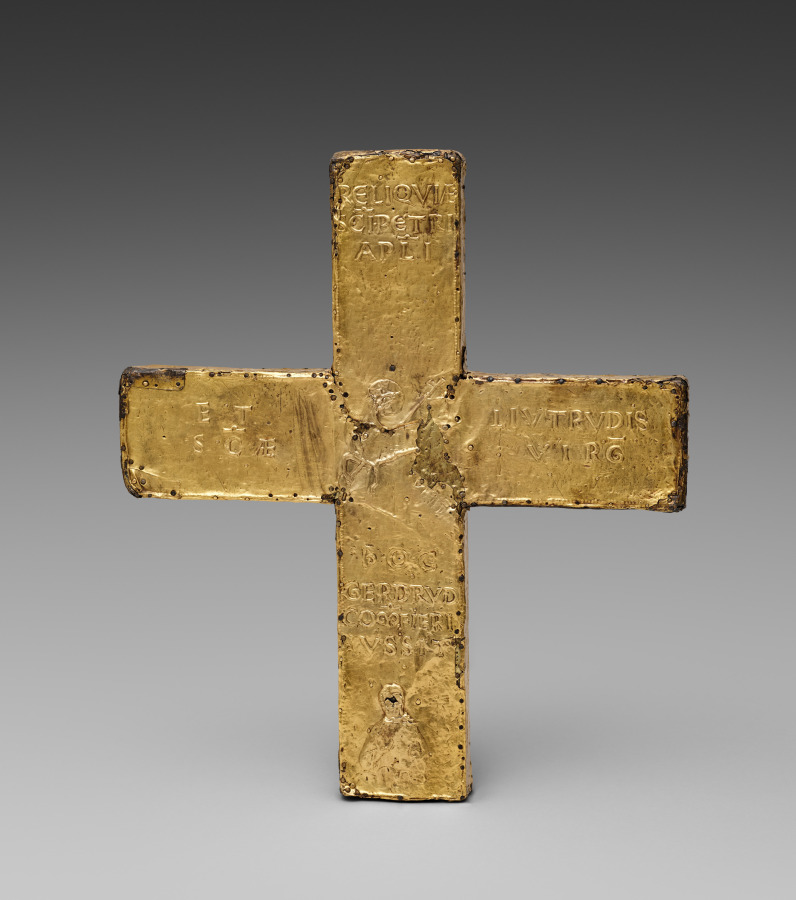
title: Ceremonial Cross of Countess Gertrude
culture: Germany, Lower Saxony?, 11th century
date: 1038 or shortly after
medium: gold: worked in repoussé; cloisonné enamel, intaglio gems, pearls, wood core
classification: Metalwork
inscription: translation of inscription on back: For the Relics of the Holy Apostle Peter and the Holy Virgin Liutrudis, Countess Gertrude Ordered this made.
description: This precious gold cross was commissioned by Countess Gertrude (died 1077) and given to the church of Saint Blaise following the death of her husband, Count Liudolf of Brunswick (died 1038). The cross was intended to be carried in liturgical processions or to be placed on a church altar. The inclusion of relics within the crosses endowed them with an additional role as devotional objects. At the center of the four cross arms, fine but much damaged cloisonné enamel plaques represent the symbols of the four Evangelists--an eagle for Saint John (above); a lion for Saint Mark (on the left); an ox for Saint Luke (on the right); and an angel for Saint Matthew (below). Pearls and precious and semiprecious stones are set within an intricate network of gold filigree while a large sapphire, inscribed in a circle and likewise surrounded by pearls and precious stones, is placed at the crossing.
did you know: Countess Gertrude's name appears on the back of the cross at the bottom.